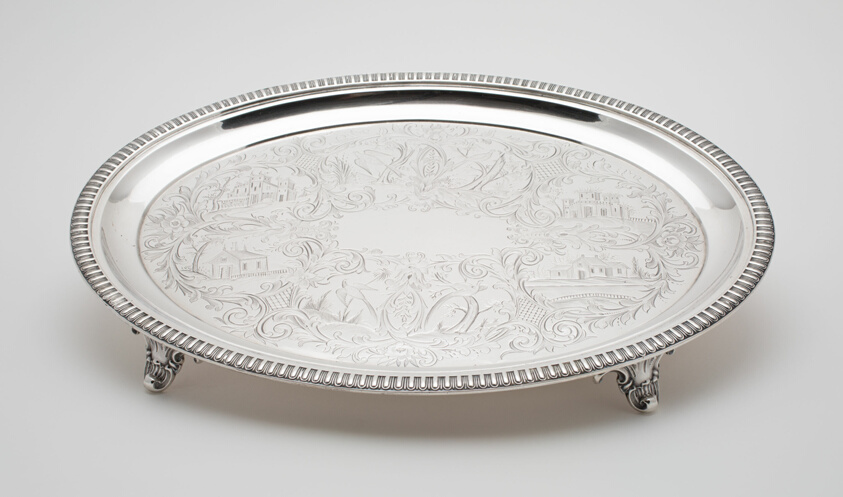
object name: Metalwork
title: Salver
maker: William Gale & Son; American, 1850–58; 1862–66; New York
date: 1852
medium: Silver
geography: New York City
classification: vessel for serving food; silver; american decorative arts; american arts; decorative arts